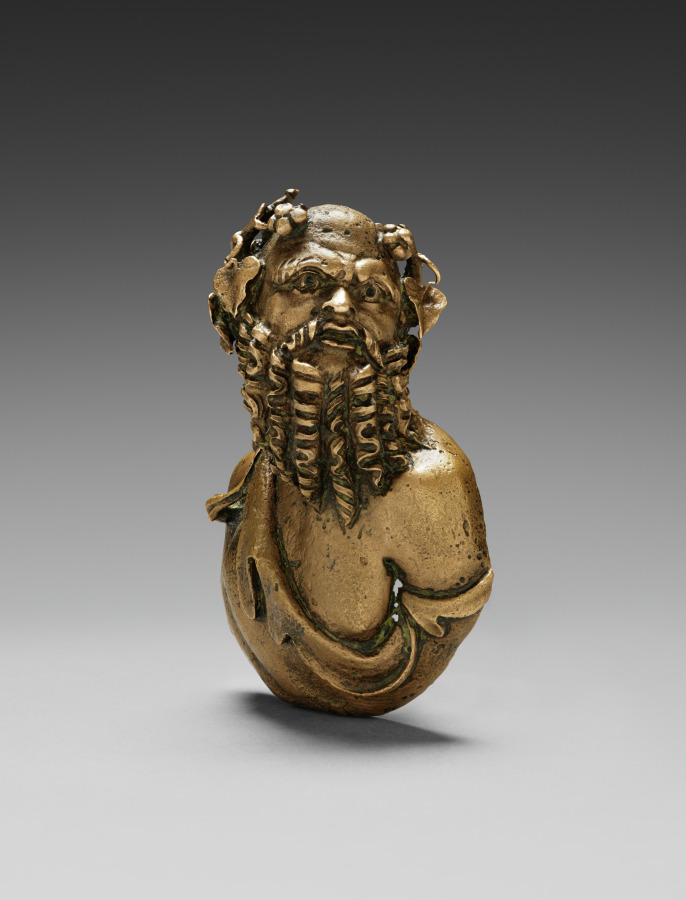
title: Silenus Bust for a Couch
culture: Italy, Roman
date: 1–125 CE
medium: bronze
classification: Sculpture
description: This bust of Silenus was part of the fulcrum or armrest of an ancient Roman couch. Silenus was the tutor and companion of Bacchus, the Roman god of wine. He is shown with a long curly beard, bushy eyebrows, and wearing a garland of ivy vines with berries. His deerskin robe, tied by the animal’s hoof, falls off his shoulder, suggesting drunkenness. The bust would have been placed at the base of the armrest where it met the seat of the couch, while an animal head likely decorated the top. As is the case with many Roman objects, Romans adapted their couch style and decoration from the Greeks.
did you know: This silenus’s beard is made up of exactly ten ringlets of curls.